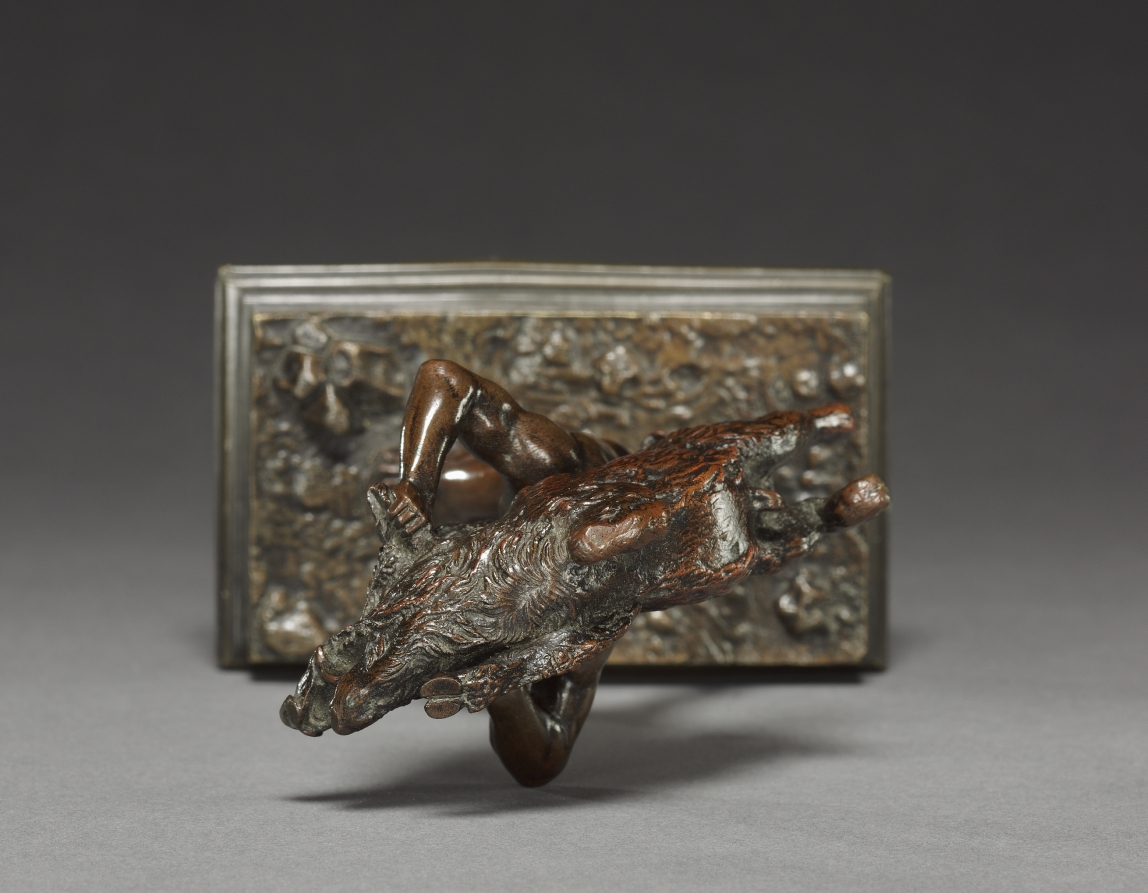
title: Hercules Carrying the Erymanthean Boar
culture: France, 19th century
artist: Antoine-Louis Barye (French, 1796–1875)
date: c. 1820–1830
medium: bronze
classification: Sculpture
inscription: signed on base: "BARYE."